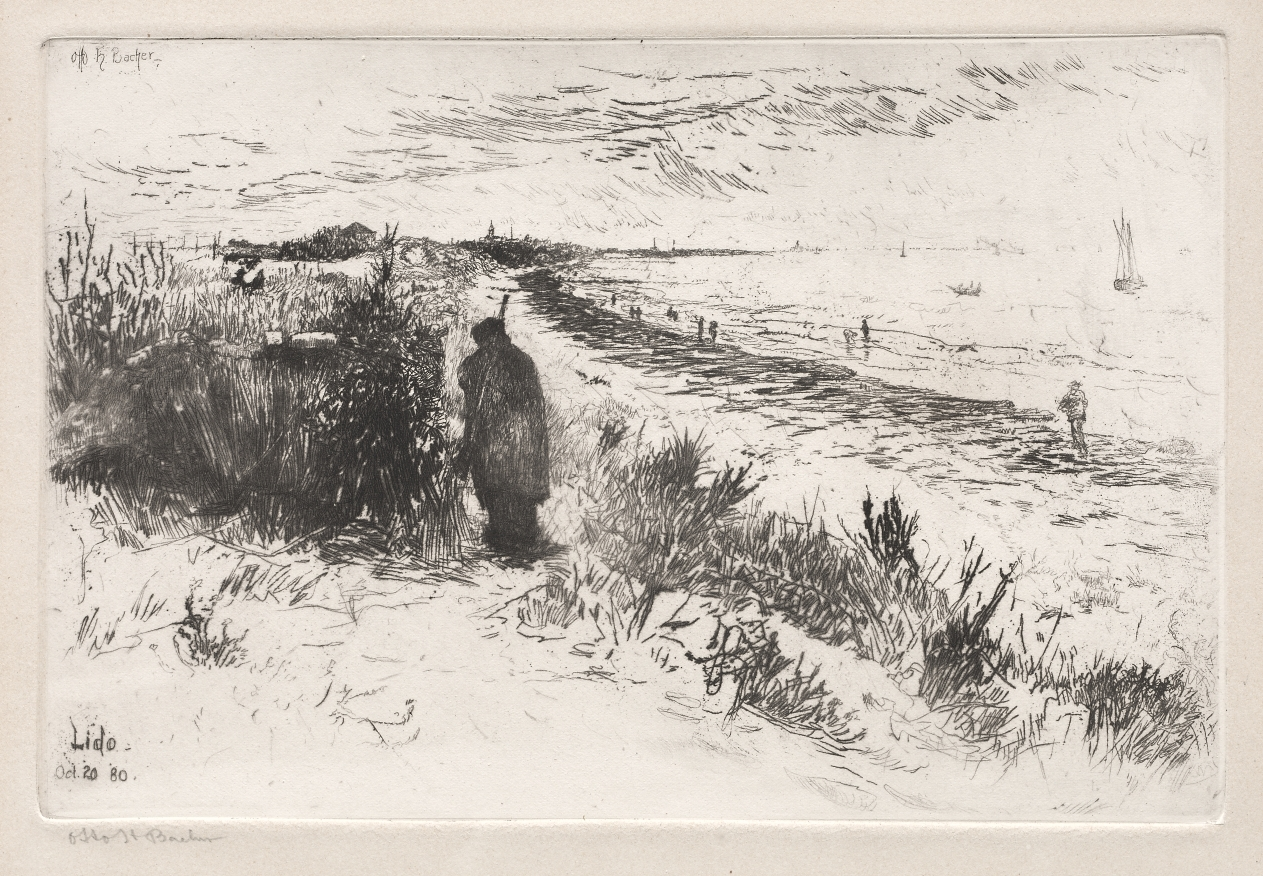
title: The Lido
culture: America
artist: Otto H. Bacher (American, 1856–1909)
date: 1880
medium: etching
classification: Print